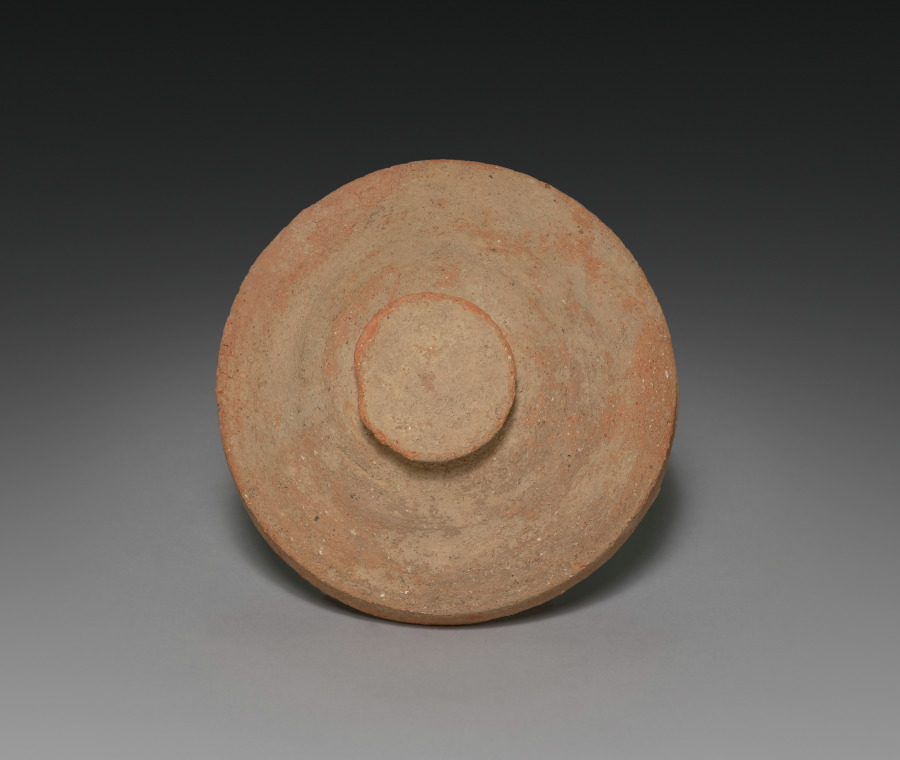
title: Covered Jar with Horn Handle (lid)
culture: Korea, Silla (57 BC-935) or Kaya (AD 42-562) period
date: 400s–500s CE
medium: red earthenware with impressed designs and applied red slip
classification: Ceramic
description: Early earthenware from the Three Kingdoms period (57 BCE–668) became widely utilized as agriculture and religion grew to be essential elements in sustaining society and its systems. The clay jars of different sizes and shapes on display were made for the following purposes: some were used to store harvested grains and seeds, some, especially lidded ones such as this example, to preserve cremated remains, and some to serve offerings in rituals.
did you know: Closed kilns built on hillsides became widely used for producing this type of pottery vessel in Korea during the Three Kingdoms period.